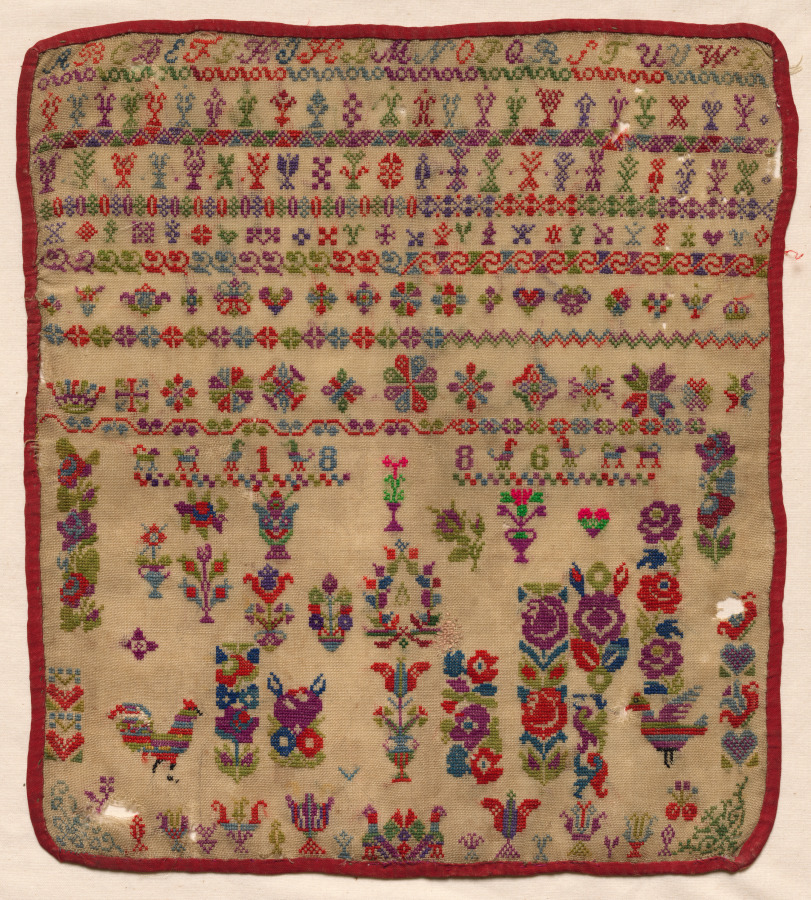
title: Sampler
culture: Czechoslovakia, late 19th century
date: 1886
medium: embroidery; coarse linen ground, wool cross stitch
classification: Sampler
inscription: rows of alphabets across top; below: "1886."